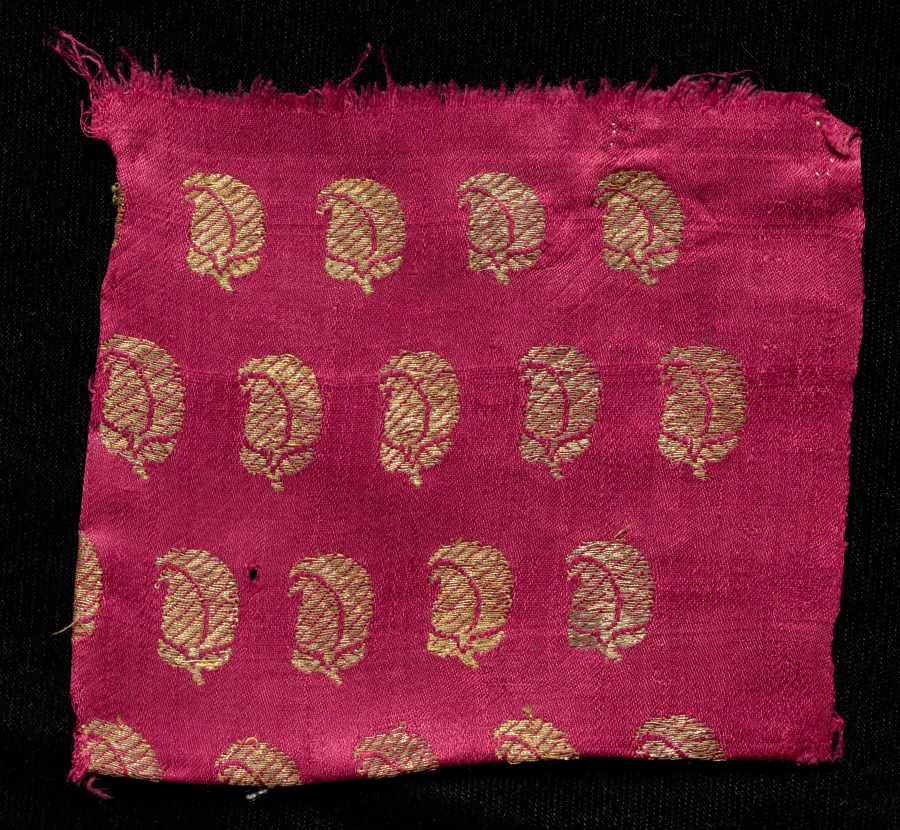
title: Fragment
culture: India, 19th century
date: 1800s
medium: brocade; silk and metal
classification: Textile